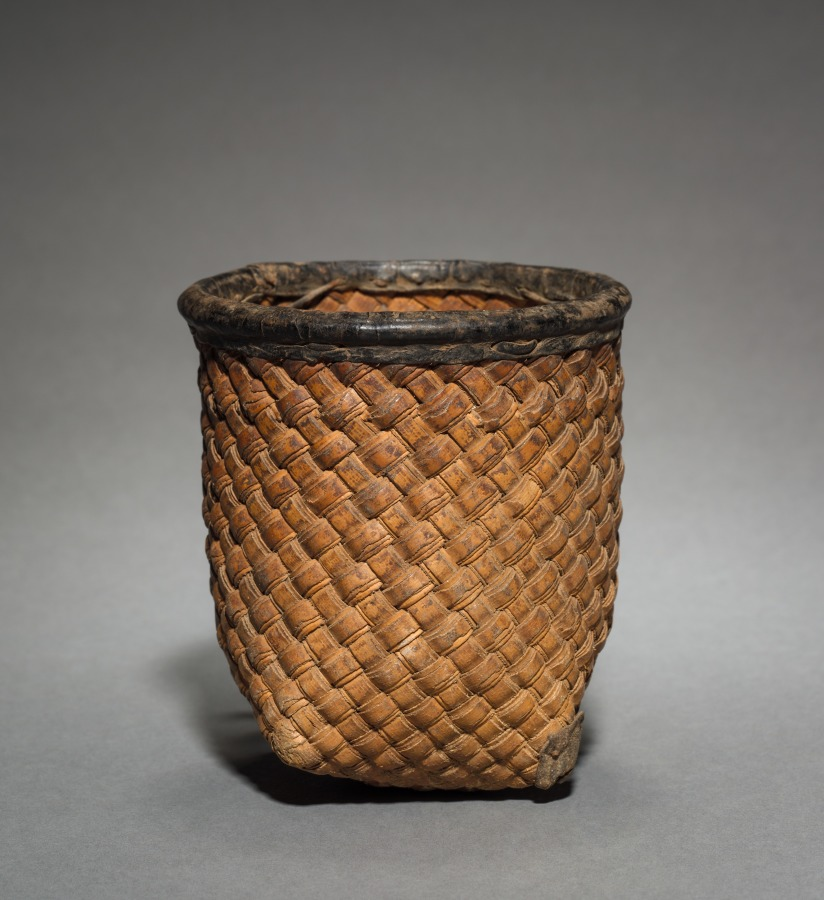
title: One of Ten Nesting Wedding Baskets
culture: Africa, Western Africa, Burkina Faso, Lobi–style maker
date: c. 1900s?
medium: Plant fiber and leather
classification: Vessels